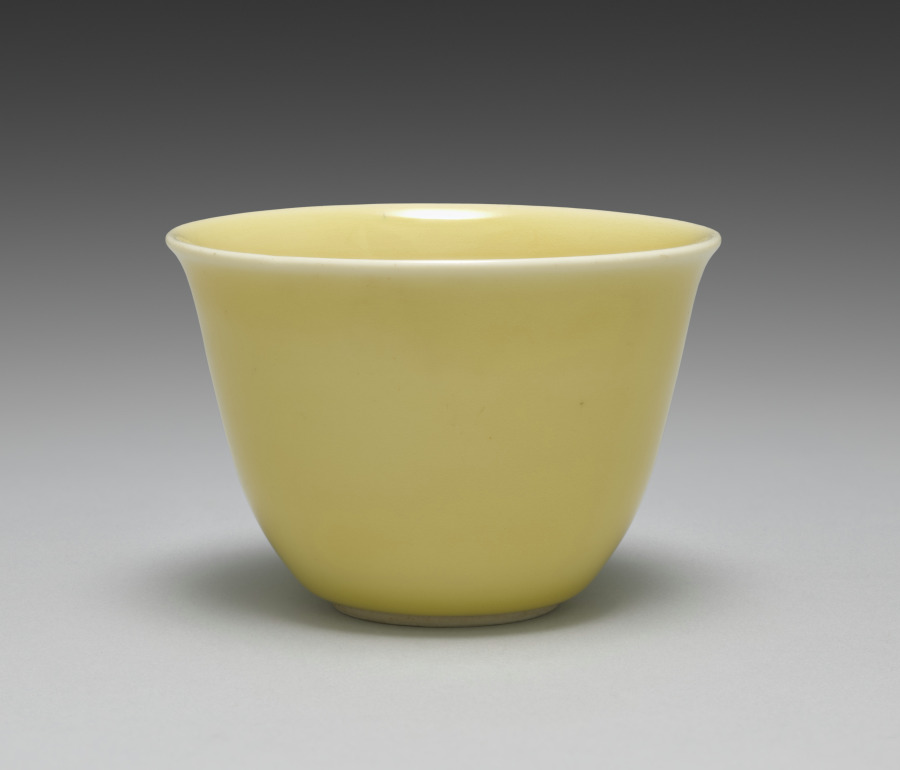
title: Cup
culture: Japan, Taishō period (1912–26) or Shōwa period (1926–89)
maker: Seifū Yohei IV (Japanese, 1872–1951)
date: 1914–46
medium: porcelain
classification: Ceramic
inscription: 清風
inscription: 清風造 【印】成山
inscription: 清風盧人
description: Like his father, Yohei IV also produced works with red or yellow monochrome glazes. His yellow-glazed works include this set of five drinking cups, a pair of sake pourers CMA 2022.216, and a sweets bowl molded into the shape of a chrysanthemum CMA 2022.218.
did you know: Seifū Yohei IV learned the ceramics industry from his father and painting from Tanomura Shosai.